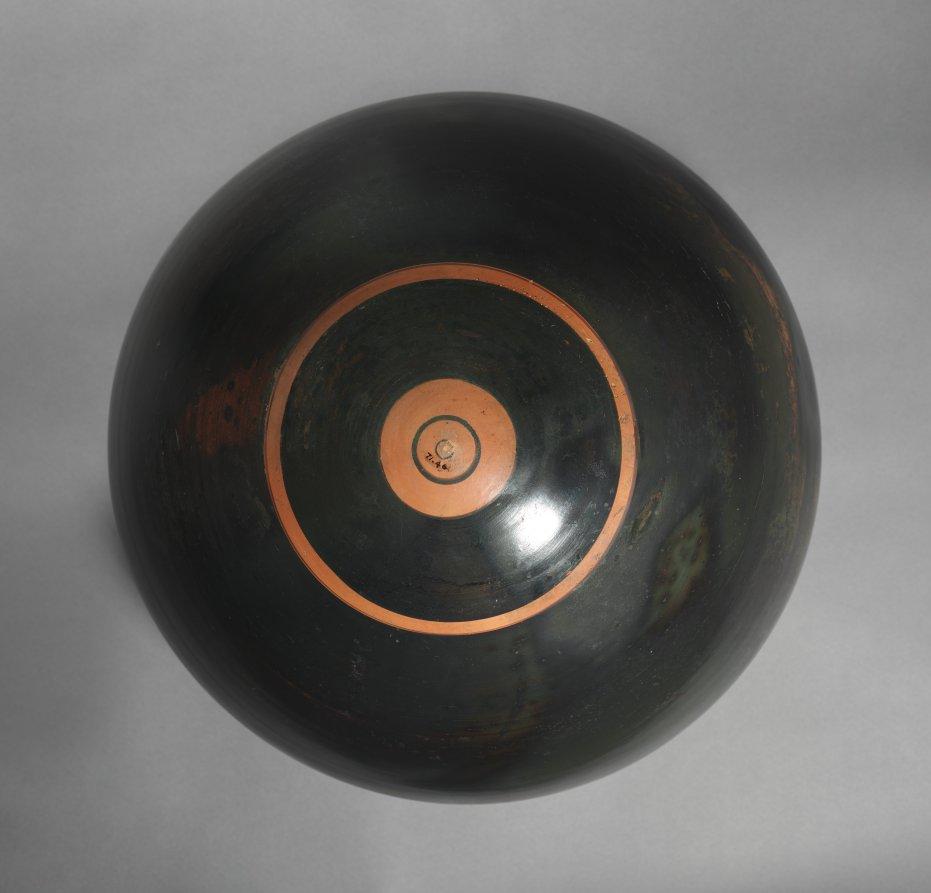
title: Black-Figure Dinos (Mixing Vessel): Warships (Int.); Heroic Scenes (Top)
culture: Greek, Attic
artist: circle of Antimenes Painter (Greek, Attic, active c. 530–510 BCE)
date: c. 520–515 BCE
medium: ceramic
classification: Ceramic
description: Designed for use at a symposium, or drinking party, this large dinos has a wide mouth allowing easy access to its contents—wine mixed with water (and sometimes other ingredients for flavoring). While drinking, symposiasts would often recite poetry and celebrate the mythological exploits of gods and heroes, perhaps prompted by the images painted on their pottery. Here, the vase-painter clearly anticipated such use; when the vessel was full, the ships painted on the inside of the rim would appear to sail across the “wine-dark sea” (to borrow a phrase found frequently in Homer’s Iliad and Odyssey). Other heroic scenes, including Herakles wrestling the Nemean lion and Theseus battling the Minotaur, appear on top of the rim, interspersed with chariots and anonymous combats.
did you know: Unable to stand on its own, this round-bottomed vessel probably once had a separately made base.